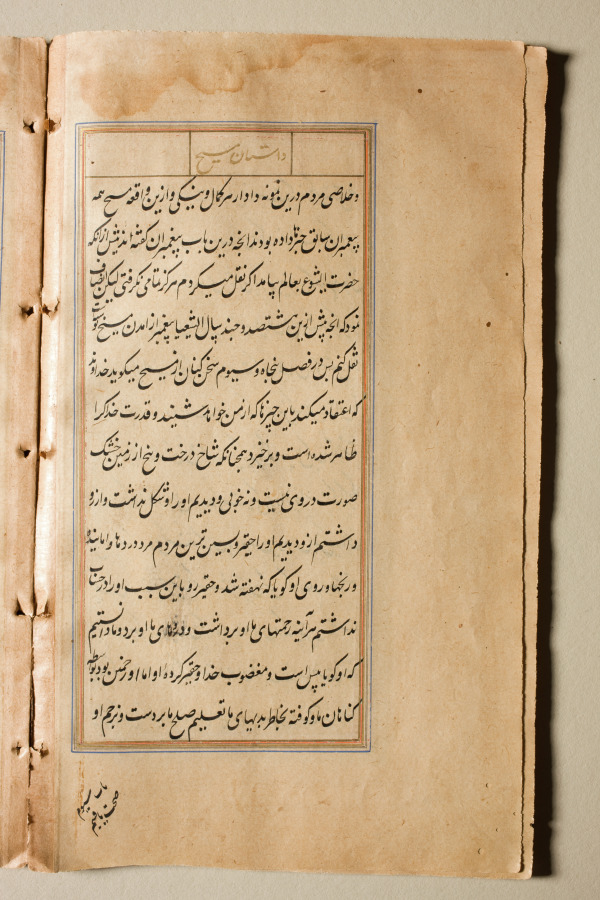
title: Text page from a Mirror of Holiness (Mir’at al-quds) of Father Jerome Xavier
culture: Mughal India, Allahabad, made for Prince Salim (1569–1627)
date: 1602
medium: Ink and gold on paper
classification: Manuscript